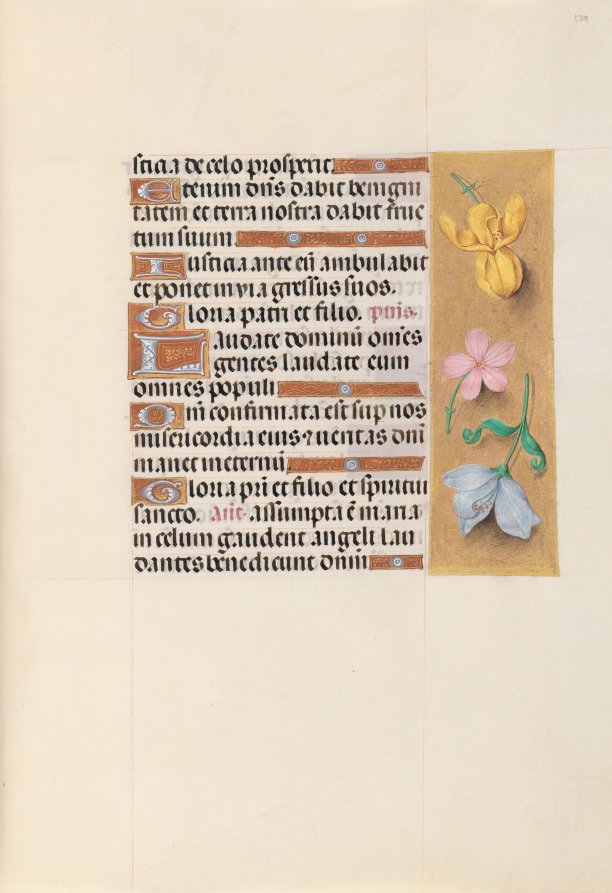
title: Hours of Queen Isabella the Catholic, Queen of Spain: Fol. 129r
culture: Flanders, Ghent and Bruges, late 15th century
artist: Master of the First Prayerbook of Maximillian (Flemish, c. 1444–1519)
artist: and Associates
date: c. 1500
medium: ink, tempera, and gold on vellum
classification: Bound Volume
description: This manuscript was illuminated by a circle of at least five highly organized manuscript painters active in the Flemish cities of Ghent and Bruges. The principal illuminator was Alexander Bening, who painted the majority of the book's miniatures. Manuscripts produced by this circle of artists are renowned for the decoration of their borders, which typically feature a rich variety of realistically-painted flowers, birds, and butterflies. This prayer book, called a book of hours, was intended not for a cleric, but for the private devotions of a lay person-in this case, Isabella the Catholic, Queen of Spain (1451-1504). Isabella's coat of arms embellishes the book's frontispiece. It is unlikely that the book was commissioned by the Queen herself; rather, she probably received it as a diplomatic gift from someone courting her patronage, perhaps Cardinal Francisco Jimenez de Cisneros. A Franciscan friar, Jimenez was dependent upon Isabella for his advancement, first to the post of Queen's confessor in 1492, and then to Archbishop of Toledo in 1495.